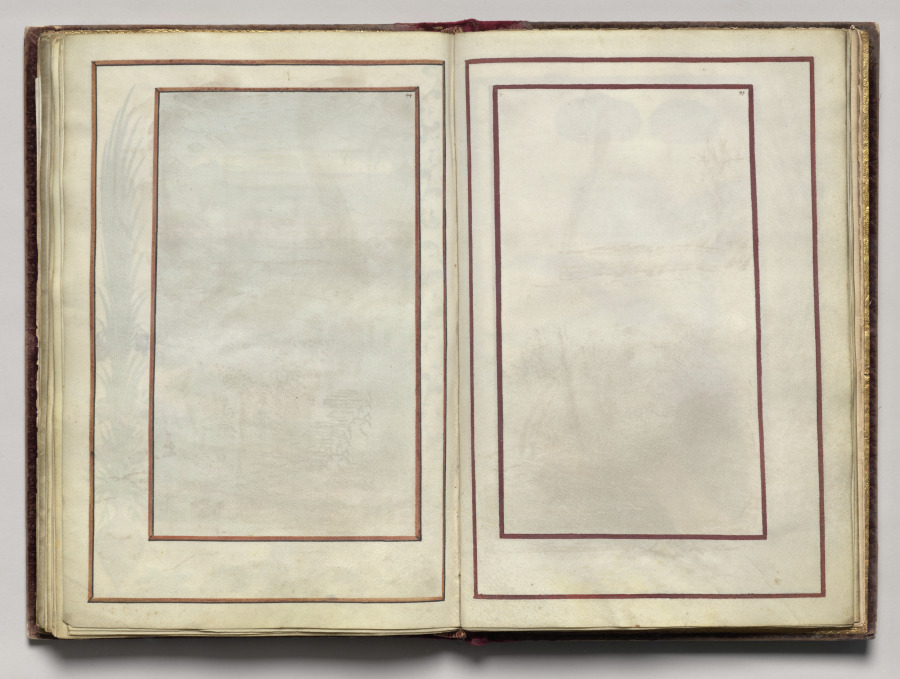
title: Border, folio 42 (recto), from Florilegium (A Book of Flower Studies)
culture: France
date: 1608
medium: watercolor, ink, silver and gold over occasional traces of pencil, on vellum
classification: Bound Volume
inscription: Dated: Poitiers 1608 (on frontispiece) Signed: On frontispiece in black ink, lower right: Van Kuyk Notation on drawing: Frontispiece: in pencil, lower margin: * élève de Van Kessel, peintre flammand (* in pencil also appears in front of Van Kuyk's name).